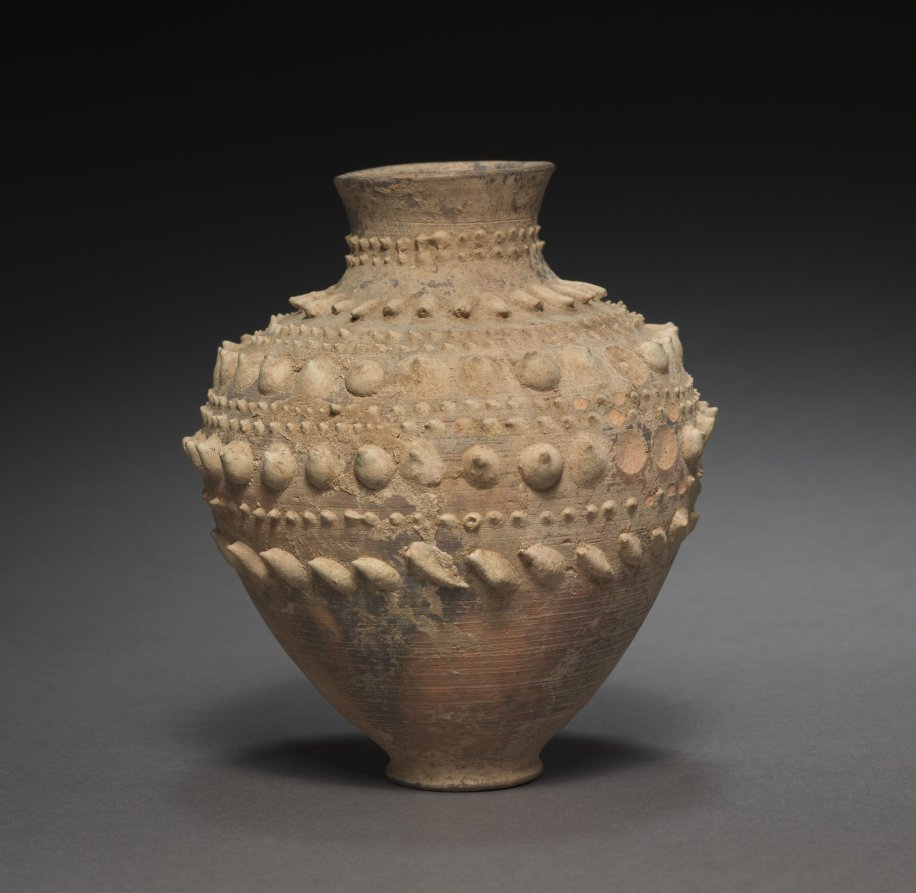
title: Barbotine Vase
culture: Egypt, Greco-Roman period (332 BCE–395 CE), Roman empire (30 BCE–395 CE)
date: 1–300 CE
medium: Marl clay ware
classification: Vessels